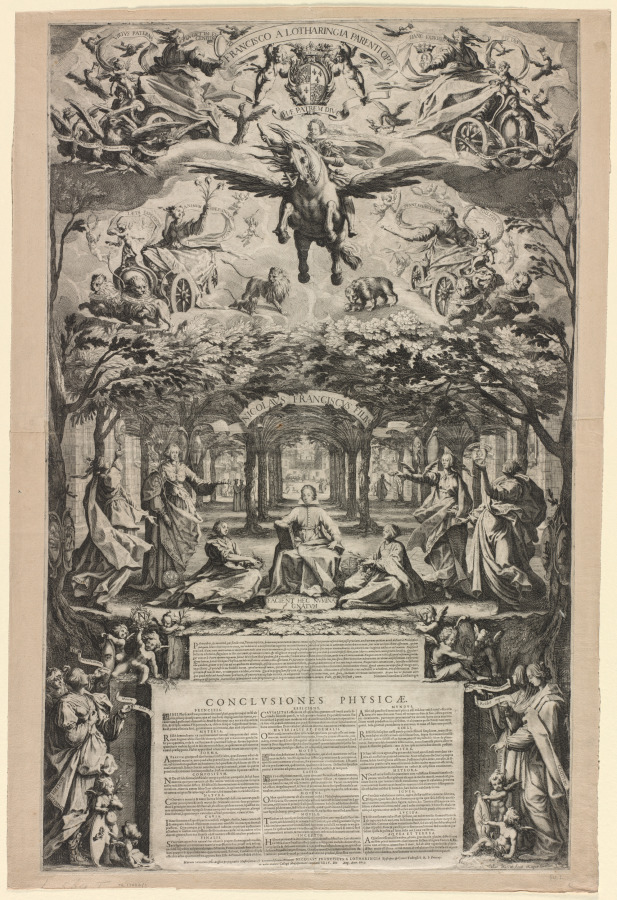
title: The Large Thesis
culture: France, 17th century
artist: Jacques Callot (French, 1592–1635)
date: 1625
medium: etching and engraving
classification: Print